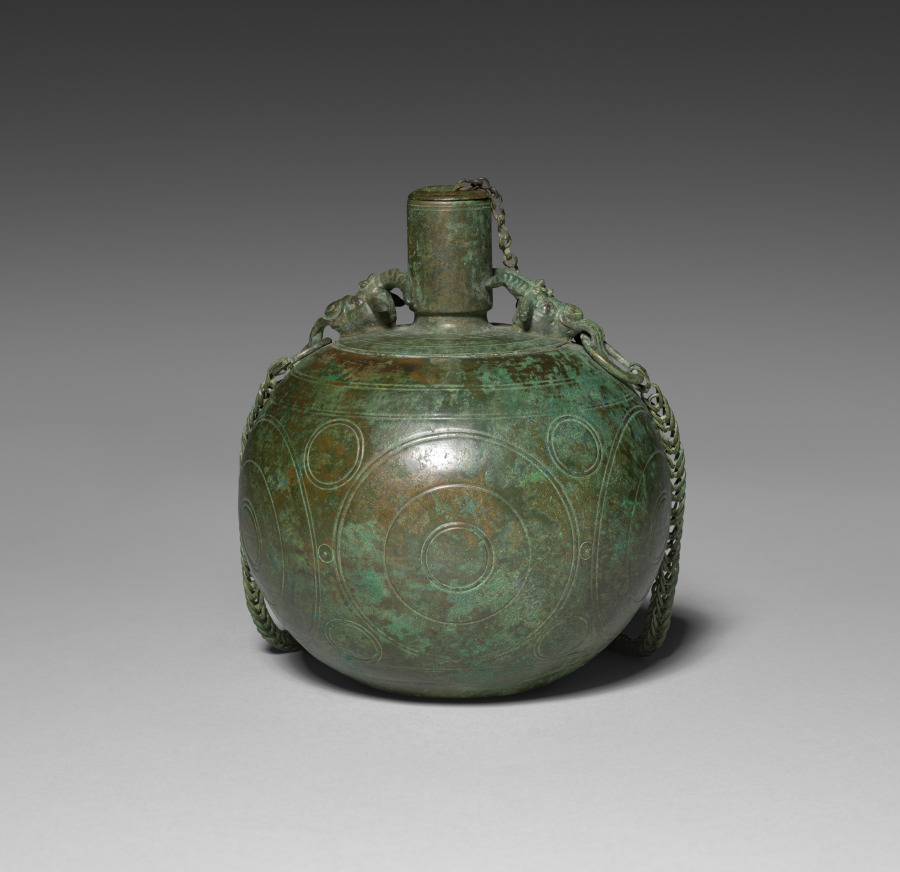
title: Canteen or Balsamarium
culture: Roman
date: 50–250 CE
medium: Bronze, cast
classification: Metalwork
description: A utilitarian container, this nearly spherical cast bronze vessel survives in surprisingly good condition. Two goat heads on the shoulder, each with inlaid silver eyes, serve as decorative attachments, holding two hand-wrought linked chains – a shorter one to secure the stopper and a longer one for hanging or carrying the vessel. The round body of the vessel is nicely complemented by a decorative program of shallowly incised bands and concentric circles.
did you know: The goat heads on the shoulder of this vessel each have inlaid silver eyes.